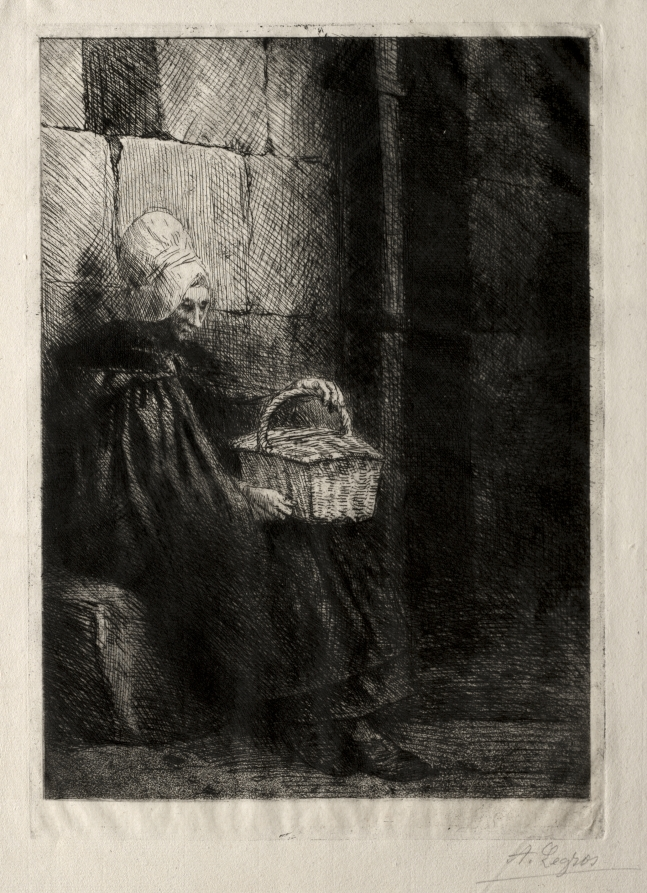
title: Landscape in the Vicinity of Boulogne, called Woman with a Basket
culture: France, 19th century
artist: Alphonse Legros (French, 1837–1911)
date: c. 1857–1911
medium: etching and drypoint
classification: Print